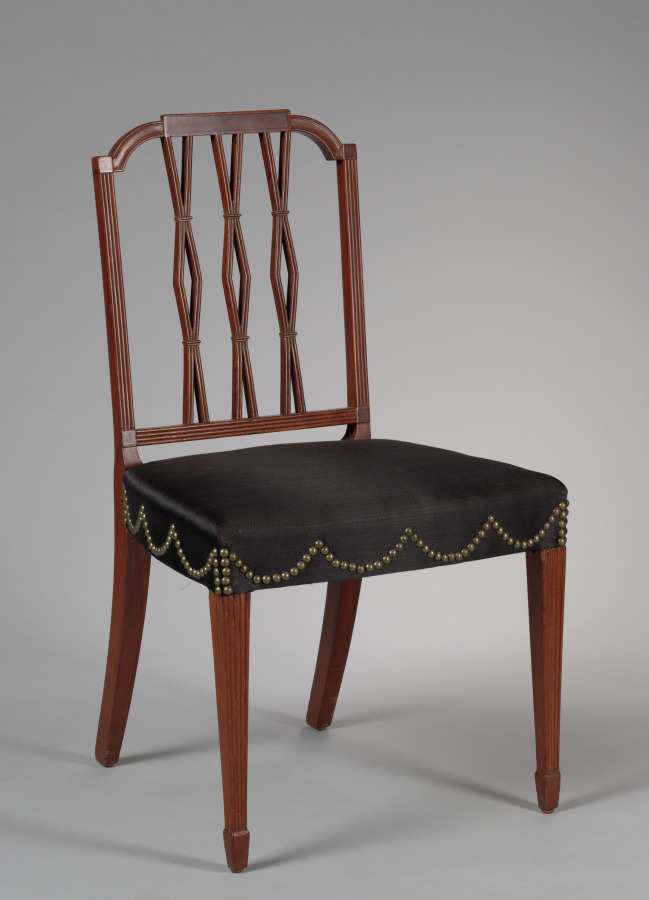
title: Side Chair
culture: America, Massachusetts, Boston, late 18th Century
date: c. 1790–1800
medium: mahogany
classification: Furniture and woodwork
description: Chairs of this or similar design seem to have been made by several Boston cabinetmakers. This chair may have belonged to one or more members of the distinguished Derby family or West family-or both-of nearby Salem, Massachusetts.